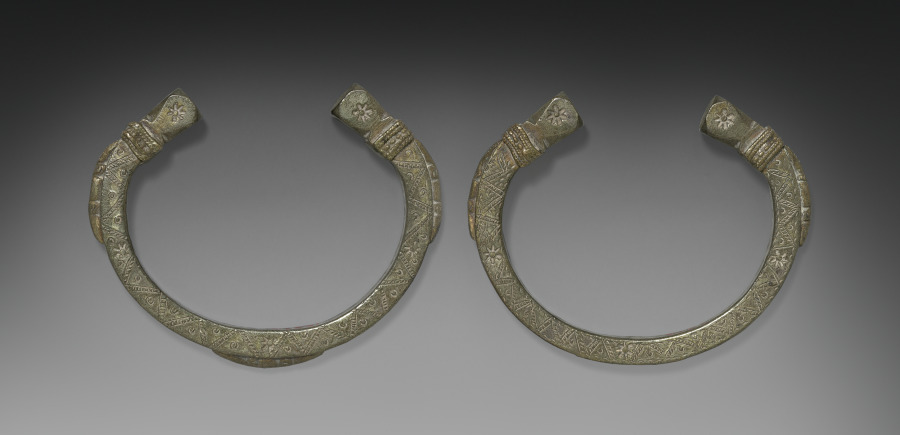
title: Anklets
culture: India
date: 1800s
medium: silver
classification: Jewelry